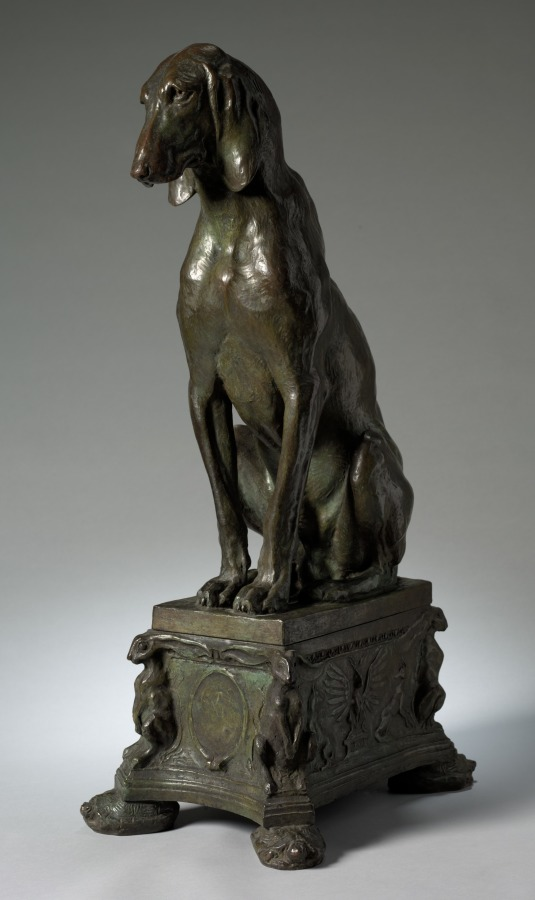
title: Hound (1 of 2)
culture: America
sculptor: Charles Cary Rumsey (American, 1879–1922)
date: 1912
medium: bronze andiron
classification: Sculpture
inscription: Signed on plinth: © C. C. Rumsey